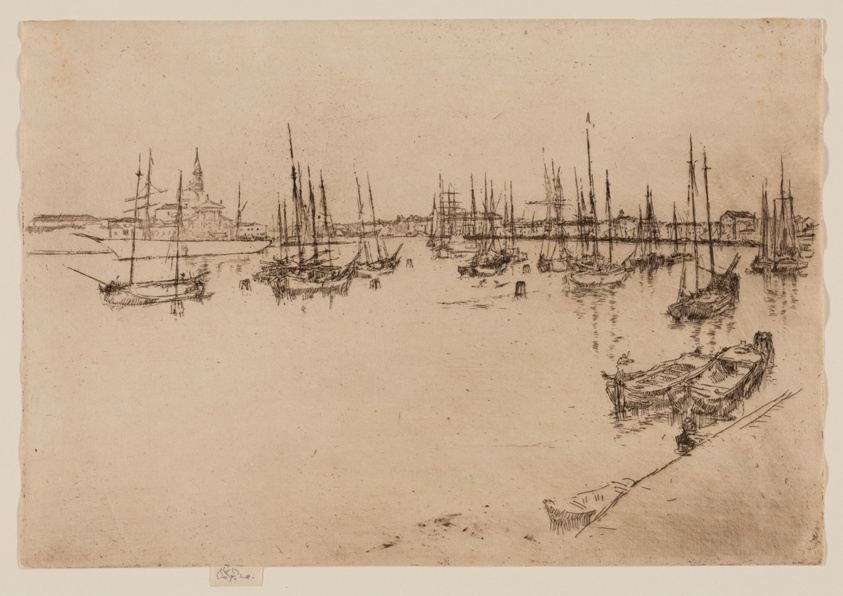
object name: Print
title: San Giorgio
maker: James McNeill Whistler (American, 1834-1903)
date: 1879/80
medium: Etching and drypoint with foul biting in black ink on cream laid paper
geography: United States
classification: etching; foul biting; print; prints and drawing; paper; drypoint